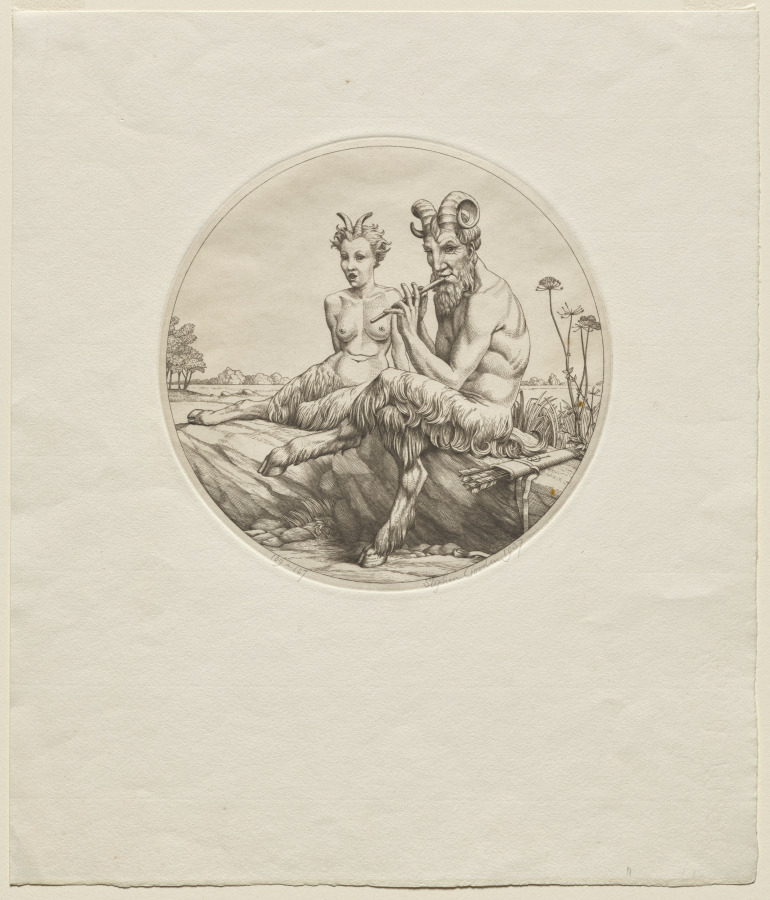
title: Two Satyrs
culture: England, 20th century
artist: Stephen Gooden (British, 1892–1955)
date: 1937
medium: engraving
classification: Print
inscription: signed and dated in graphite, lower right margin: Stephen Gooden 1937; lower left margin in graphite: 109-107